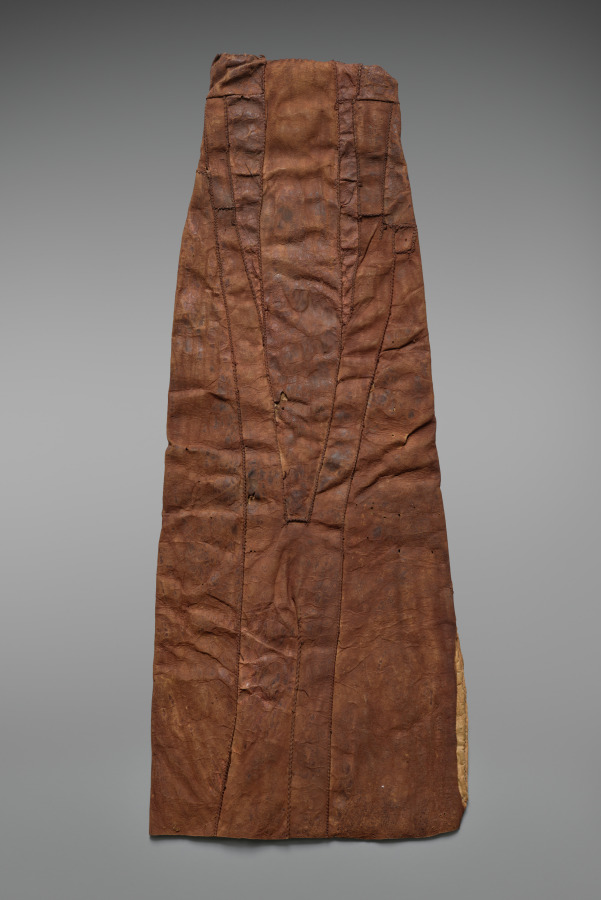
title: Royal ceremonial headdress (umnqwazi)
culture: Africa, Southern Africa, South Africa, Southeast Cape Region, Unknown female Xhosa-style maker(s)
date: 1800s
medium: Glass beads, sinew, and hide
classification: Textile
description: Elite Xhosa women once wore beaded garments like this on festive occasions. Made almost completely from imported Venetian or Bohemian glass beads, they were overt status symbols. Imported beads functioned as money for the Xhosa between circa 1770 and 1829. These garments’ female maker carefully selected beads of the highest quality, uniform in color, shape, and size. Made in the same shape as the pendant, a swallowtail-shaped apron (CMA 2010.206) worn under the skirt completed the ensemble.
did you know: The beads to make an ensemble like this cost several cattle in the early 1800s, an amount most couldn't afford.